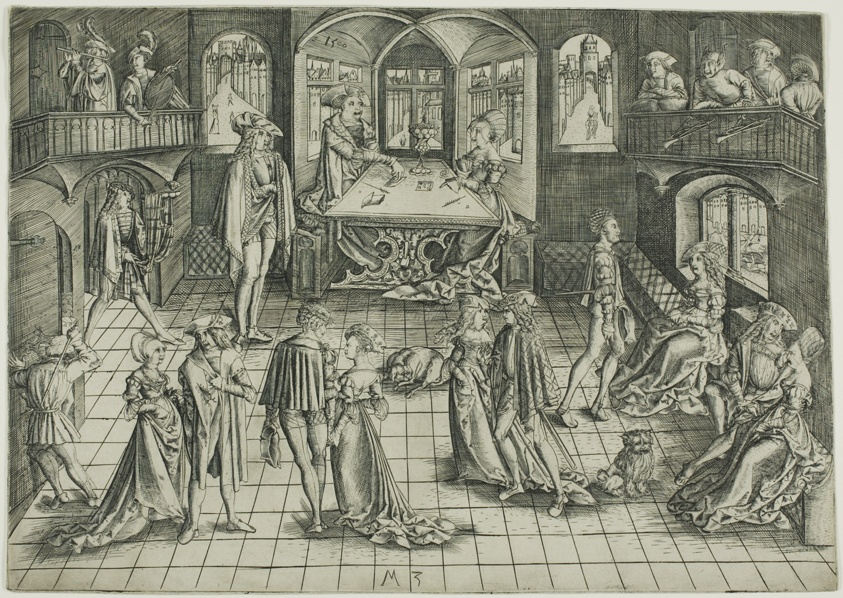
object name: Print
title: The Ball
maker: Master M.Z.; German, active 1500-1550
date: 1500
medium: Engraving on ivory laid paper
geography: Germany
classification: engraving; print; prints and drawing